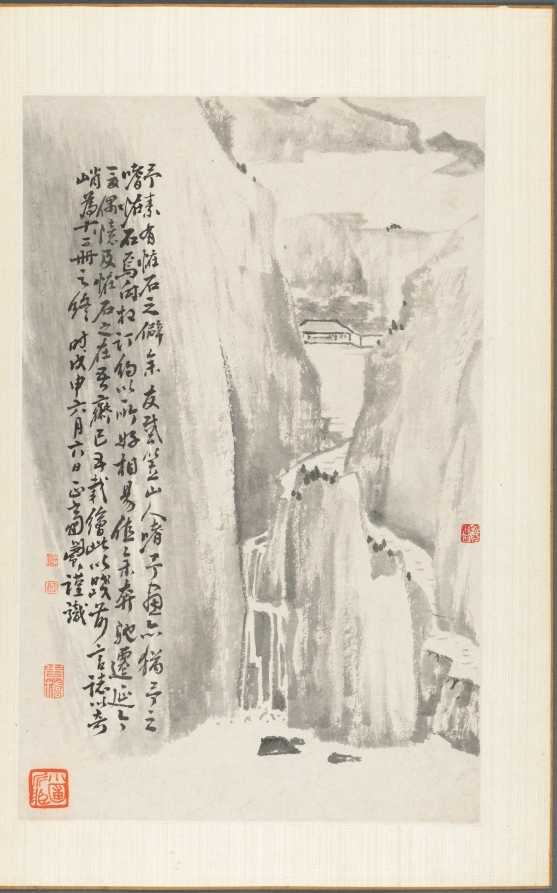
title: Sheer Cliffs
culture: China, Qing dynasty (1644-1911)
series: Album of Miscellaneous Subjects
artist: Min Zhen (Chinese, 1730–after 1788)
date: 1788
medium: album leaf, ink on paper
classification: Painting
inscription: 予素有怪石之僻。余友戴笠山人嗜予畫，亦猶予之嗜怪石焉。向故訂約，以所好相易。值余奔馳遷延，今夏偶憶及怪石之在吾齋已五載。繪此以踐前言。誌以奇峭為十二冊之終。時戊申六月六日，正齋閔貞謹識。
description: Min Zhen, who was orphaned at age 12 and developed an eccentric personality, was trained by Tang Yin (1682–1756), a writer, playwright, and superintendent of the imperial porcelain workshops in Jingdezhen. The connection to him may have enabled Min to stay in Beijing for a decade from around 1773. It is not clear whether he ever resided in Yangzhou, but his style is in many instances reminiscent of that of Yangzhou artist Huang Shen. This album demonstrates Min’s versatility and mature style in the last years of his life.